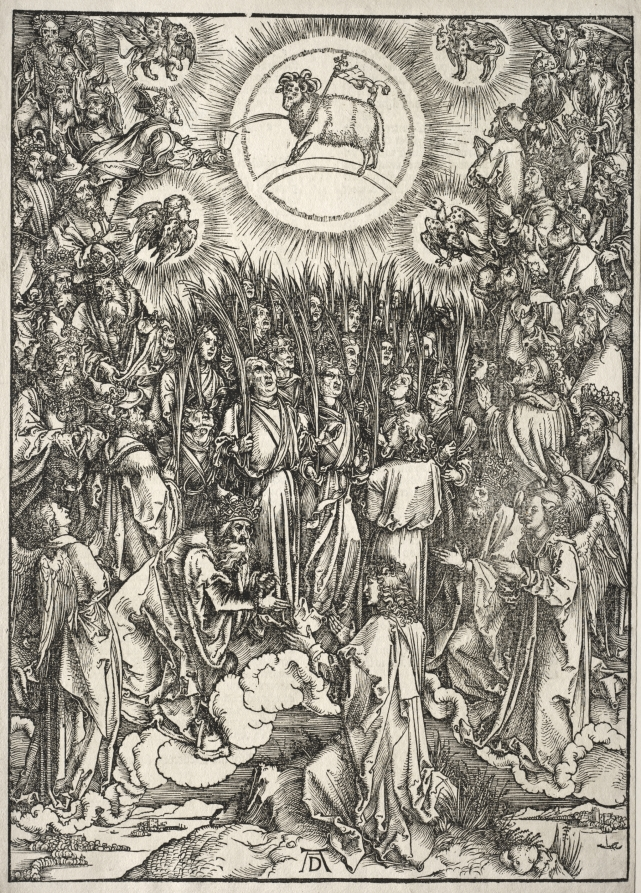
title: Revelation of St. John: The Adoration of the Lamb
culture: Germany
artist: Albrecht Dürer (German, 1471–1528)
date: 1511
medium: woodcut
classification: Print